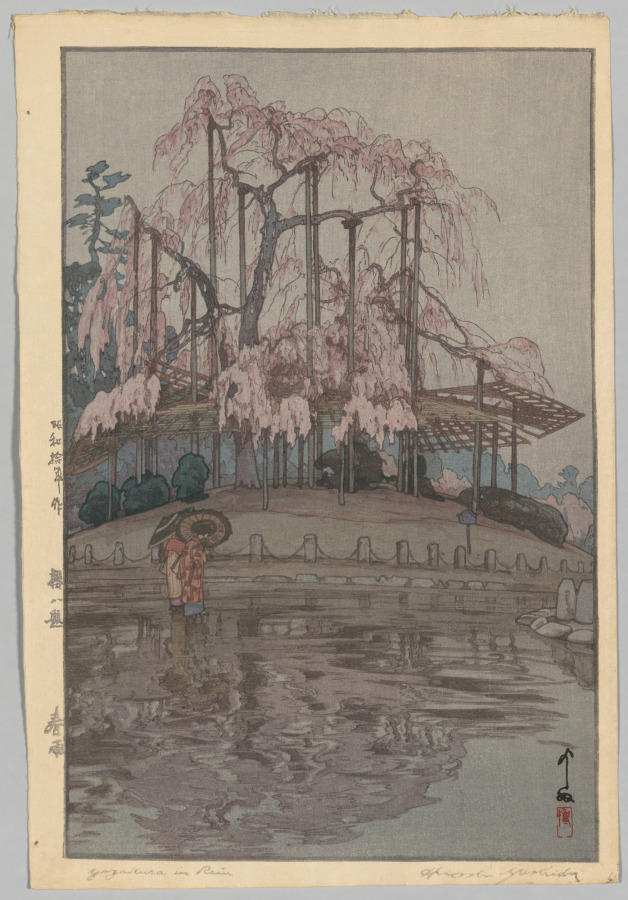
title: Eight Scenes of Cherry Blossoms: Spring Rain (Sakura hachidai: Harusame)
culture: Japan, Shōwa period (1926–89)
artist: Yoshida Hiroshi (Japanese, 1876–1950)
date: after 1935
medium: Woodblock print; ink and color on paper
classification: Print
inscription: In pencil: Yozakura in Rain Hiroshi Yoshida